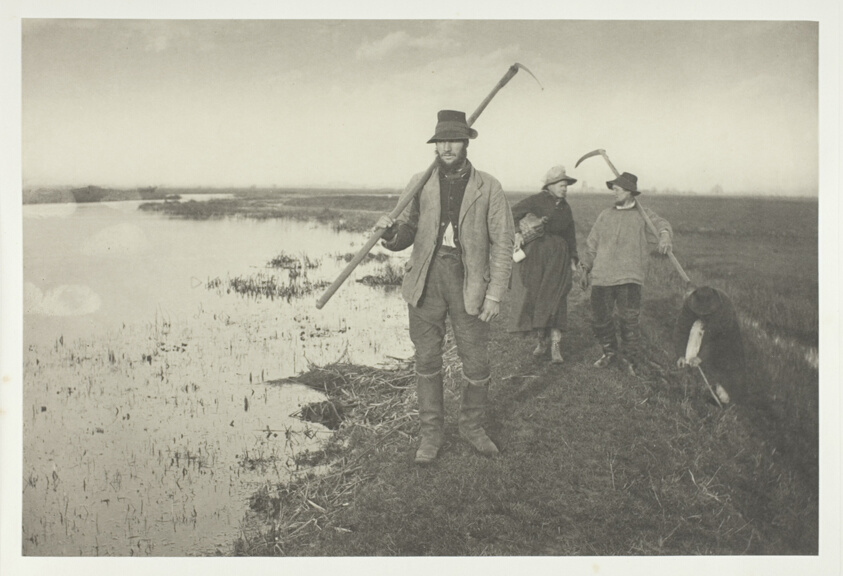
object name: Photograph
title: Coming Home from the Marshes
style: 19th century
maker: Peter Henry Emerson (English, born Cuba, 1856–1936)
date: 1886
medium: Platinum print, pl. I from the album "Life and Landscape on the Norfolk Broads" (1886)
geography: England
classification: platinum print; photographic process; photography; photograph